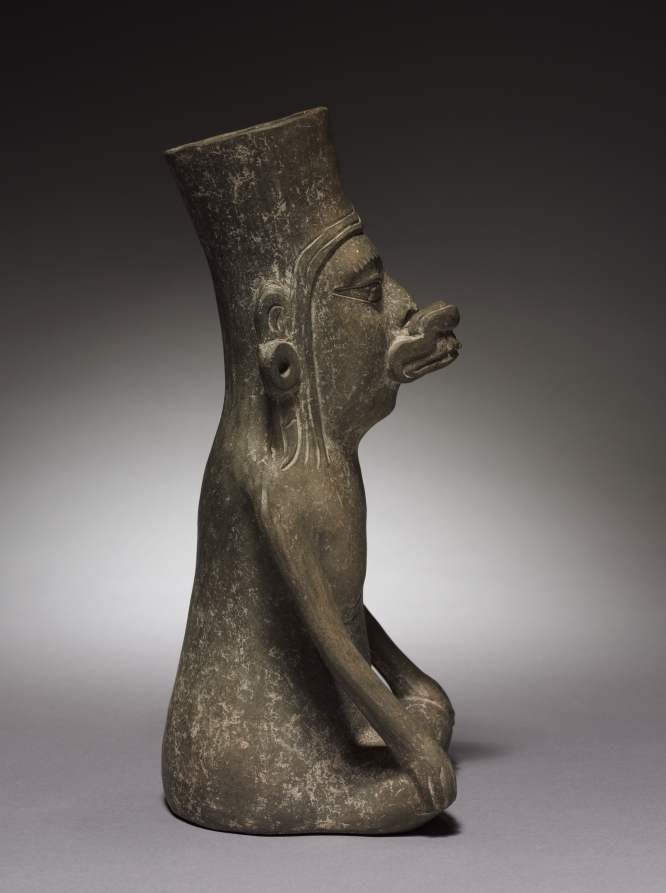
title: Urn Figure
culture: Mexico, Oaxaca, Zapotec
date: c. 150 BCE–200 CE (thermoluminescence date, 60 BCE–642 CE)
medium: earthenware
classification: Sculpture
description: This simply posed and costumed urn figure represents a goddess, or perhaps an ancestress. Early Zapotec ceramic art has a spare elegance that contrasts strongly with the florid ornamentation of later works.